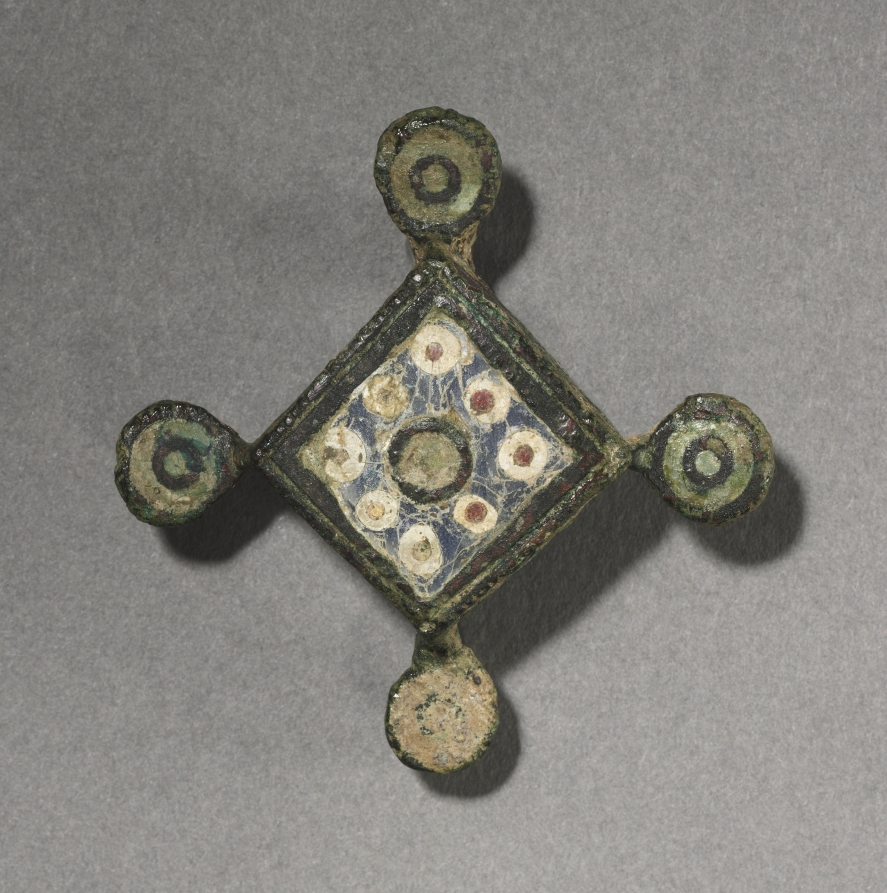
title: Ornamental Brooch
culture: Gallo-Roman or Romano-British, Migration period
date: c. 100–300 CE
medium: bronze and champlevé enamel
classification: Jewelry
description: These brooches functioned as garment clasps (much like the generally larger fibulae) and are distinctive for their decorative enamels. The art of enameling was highly popular among the conquered peoples who lived on the outskirts of the Roman empire, chiefly the Celts and the Gauls. Though the enameling technique was practiced by the Romans themselves on small objects, the brightly colored decoration readily appealed to "barbarian" taste. By the AD 200s, enameled brooches like these were being made in abundance by the native peoples of Britain and Gaul (modern France and Belgium).